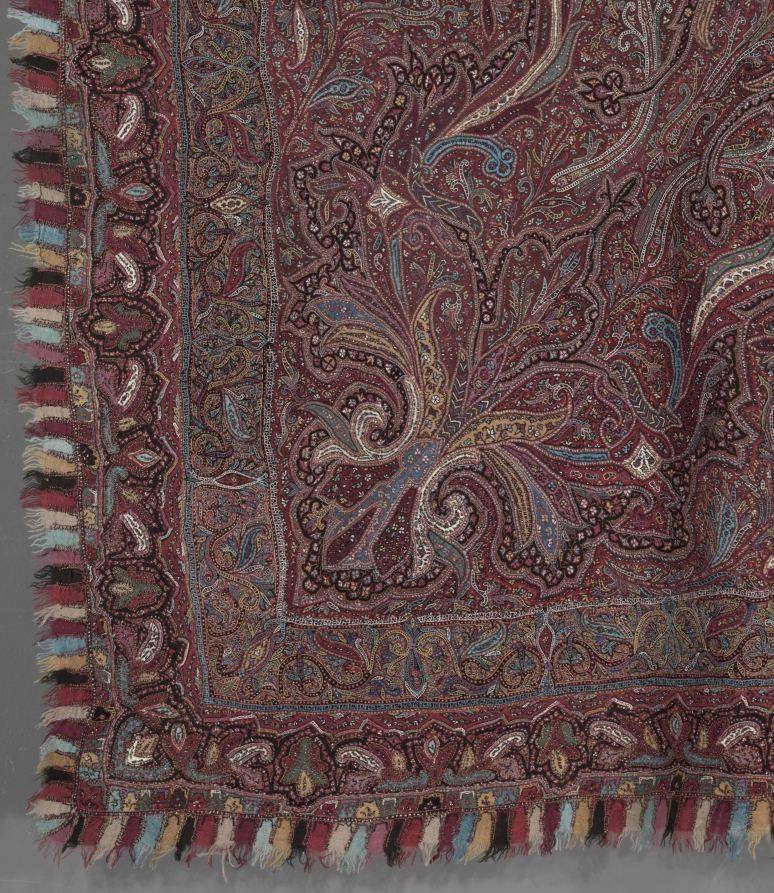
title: Shawl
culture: India, Kashmir, late 19th century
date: 1870s - 1880s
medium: embroidery, large pieced areas: wool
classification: Embroidery